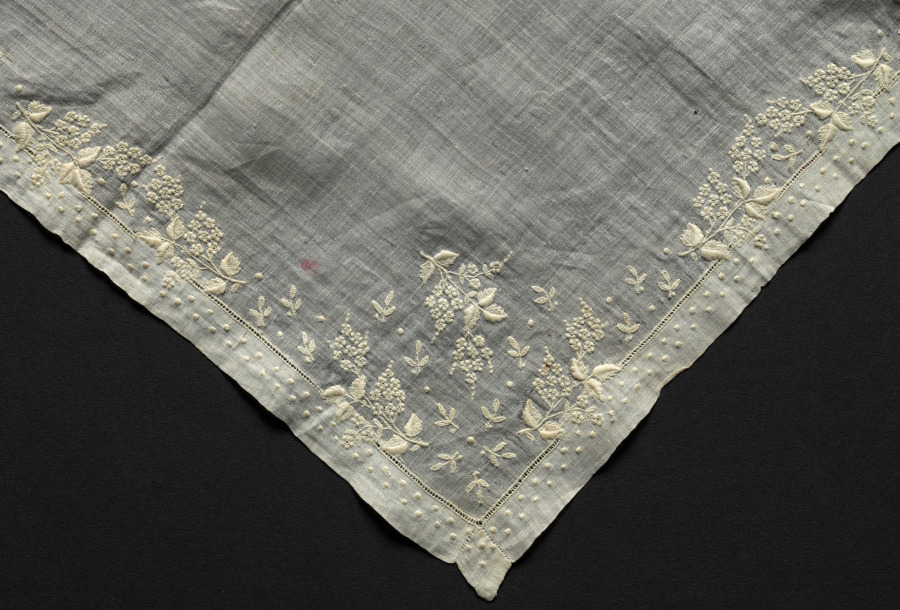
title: Embroidered Handkerchief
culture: Austria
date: 1800s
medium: Plain weave linen: embroidered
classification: Embroidery